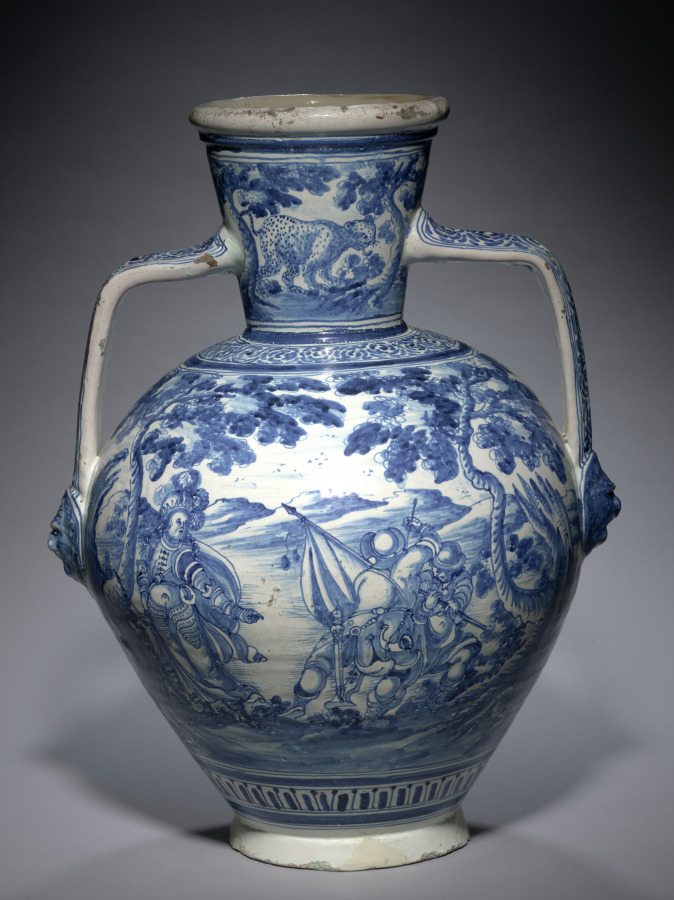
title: Two-Handled Jar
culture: Spain, Talavera, 17th century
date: early 1600s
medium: tin-glazed earthenware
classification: Ceramic